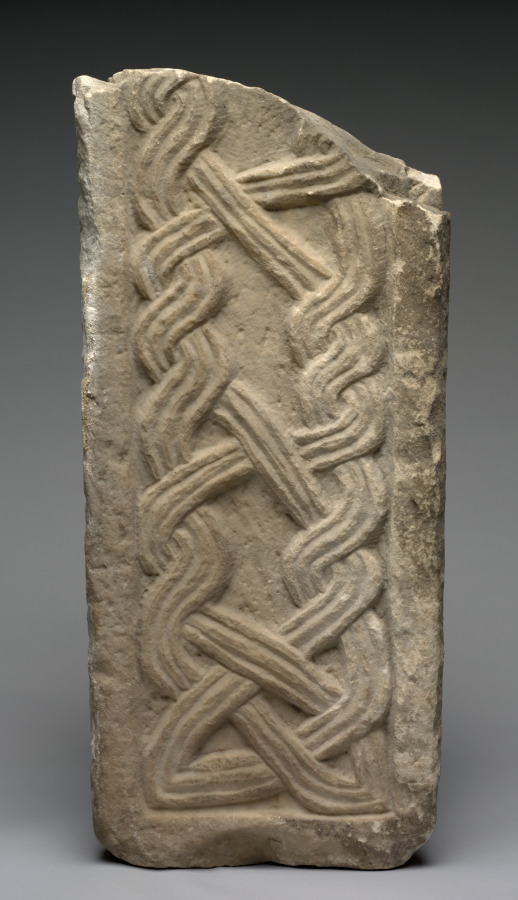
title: Transenna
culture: Lombardic, Italy, Migration period, 8th-9th Century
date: 700s-800s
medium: marble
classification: Sculpture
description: In Christian architecture a transenna is an openwork screen of stone or metal enclosing a shrine. These transenna elements were found in Rome; the posts were said to have been excavated on the Coelian Hill and may have originally formed part of the transenna of the Church of San Saba. The Lombards were an ancient Germanic-speaking tribe that settled in Italy after 568. Their artistic tradition was originally centered on small objects of personal adornment like buckles and brooches. After occupying Italy, the Lombards found themselves in contact with large-scale sculpture of classical and early Christian origin that, by the end of the 700s, they had learned to adopt and imitate, as seen here.